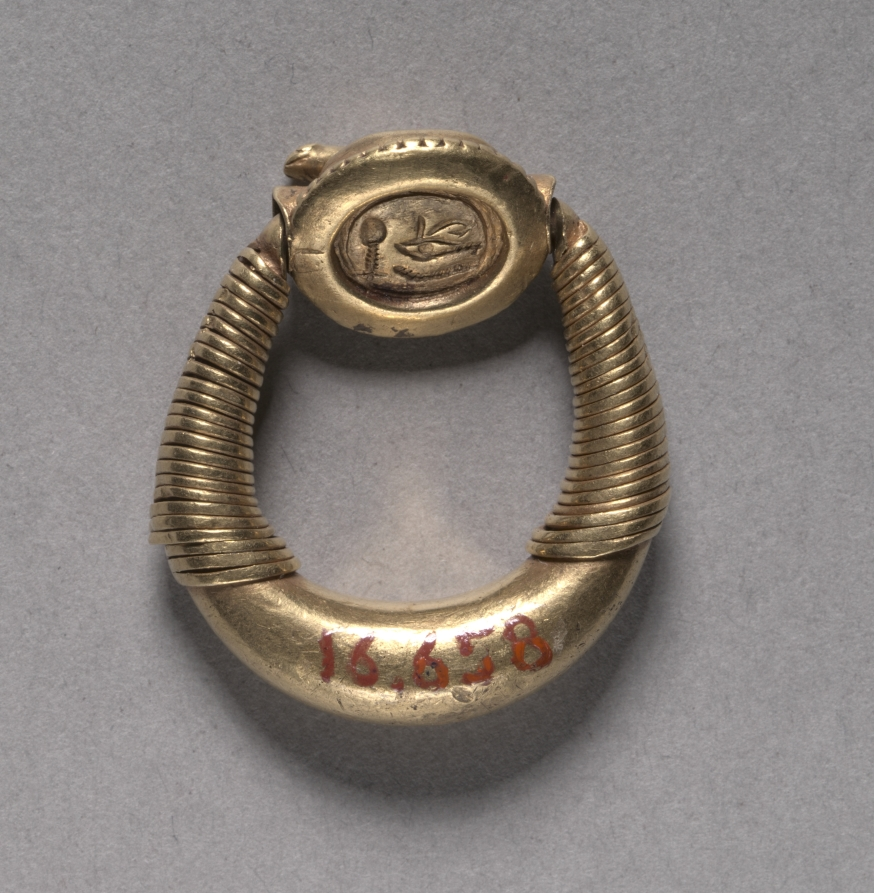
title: Finger Ring with Frog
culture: Egypt, New Kingdom (1540–1069 BCE), Dynasty 18, reign of Akhenaten (1351–1334 BCE)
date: c. 1353–1337 BCE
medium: gold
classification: Jewelry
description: The shank or band of this ring is crescent-shaped and circular in section; its upper sections are covered with heavy gold wire. The oval bezel on a swivel, the metal that holds the stone, takes the form of a scaraboid, or seal amulet in the shape of a scarab. Its sides are encircled by a double row of granules and are surmounted by a delicately molded frog in the round. The underside is incised with a nefer-sign to the right and a wedjat-eye.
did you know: An exact duplicate of this ring, apart from the inscription, is in the Royal Scottish Museum in Edinburgh.